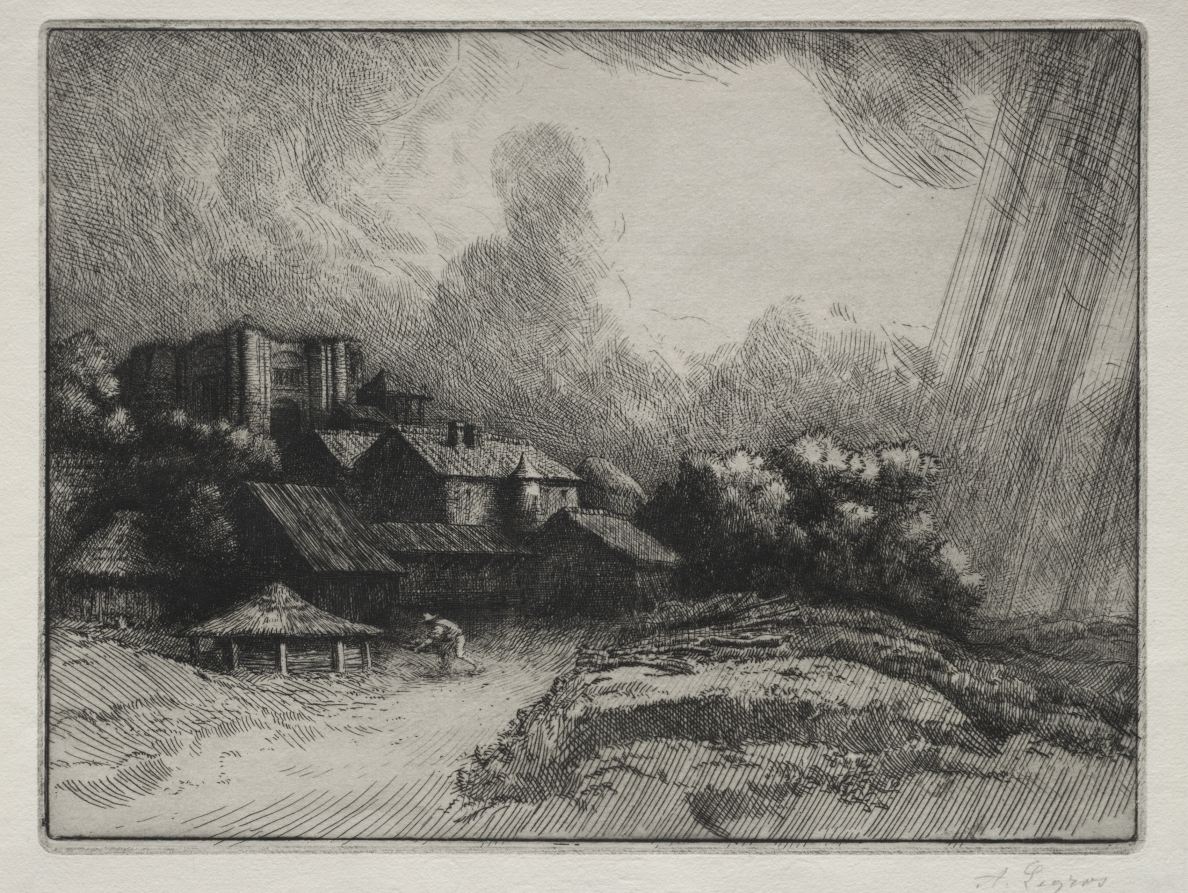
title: The Abbey Farm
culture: France, 19th century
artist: Alphonse Legros (French, 1837–1911)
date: c. 1857–1911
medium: etching and drypoint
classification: Print